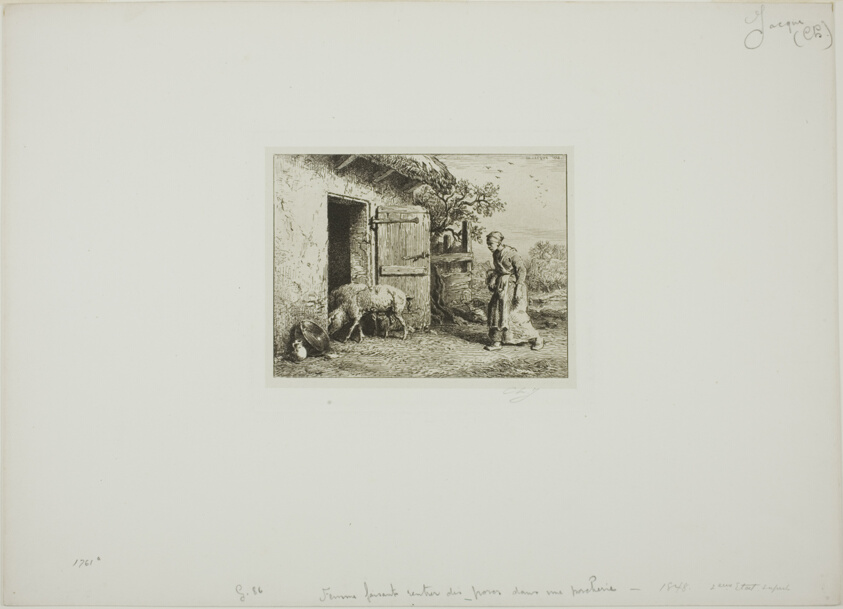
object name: Print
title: Woman Bringing Her Pigs Back Home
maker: Charles Émile Jacque (French, 1813-1894)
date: 1848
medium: Etching and roulette on China paper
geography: France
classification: etching; print; prints and drawing